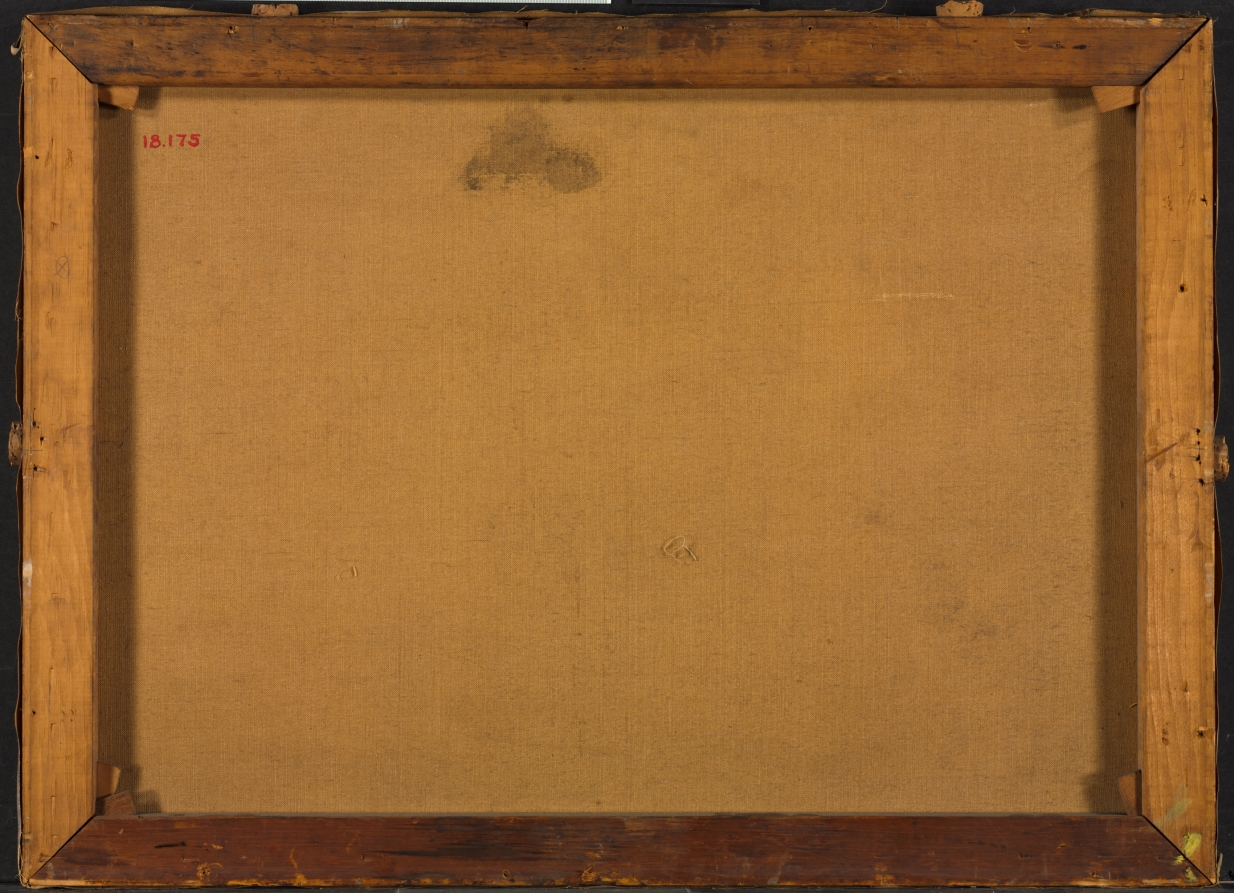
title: Evening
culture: America, Ohio, Cleveland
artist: Hugh Huntington Howard (American, 1860–1927)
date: before 1919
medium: oil on canvas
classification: Painting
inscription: signed: HHHoward.